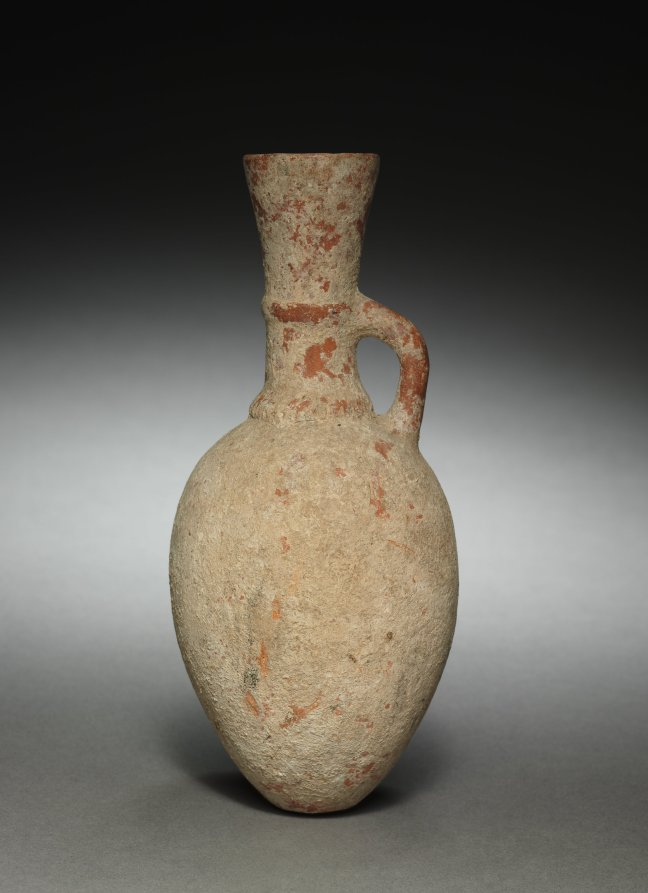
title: Jug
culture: Iran, Amlash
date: c. 1000 BCE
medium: terracotta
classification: Ceramic